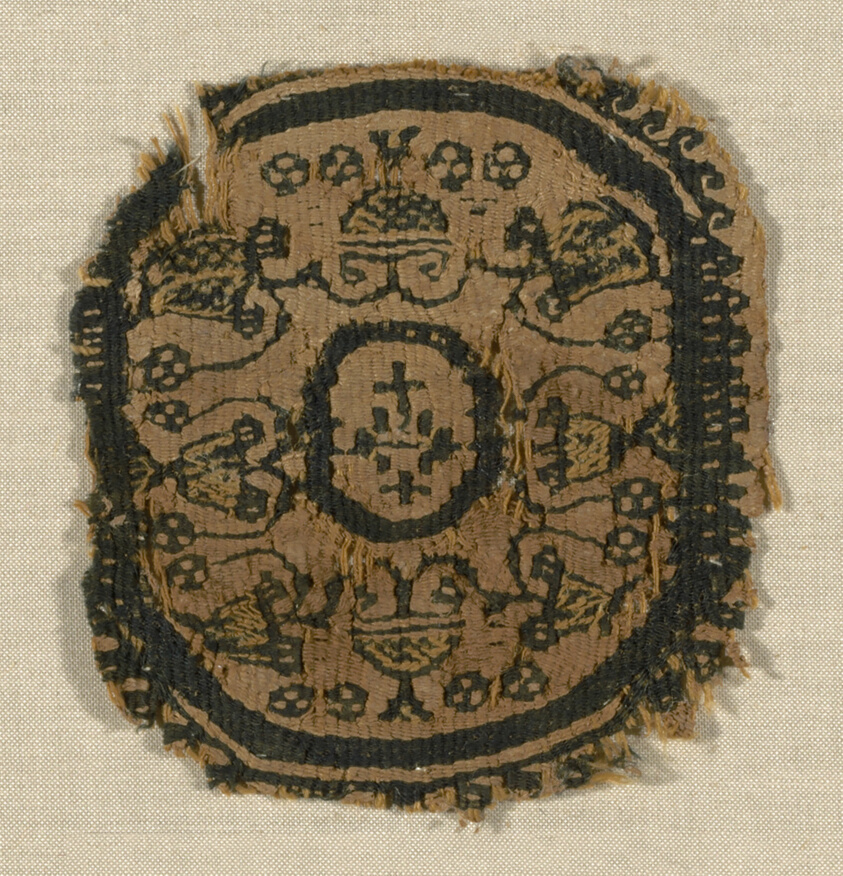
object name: Textile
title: Roundel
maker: Coptic (Egypt)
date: Arab period (641–969), 9th century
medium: Linen, tapestry weave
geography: Egypt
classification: textile; weaving